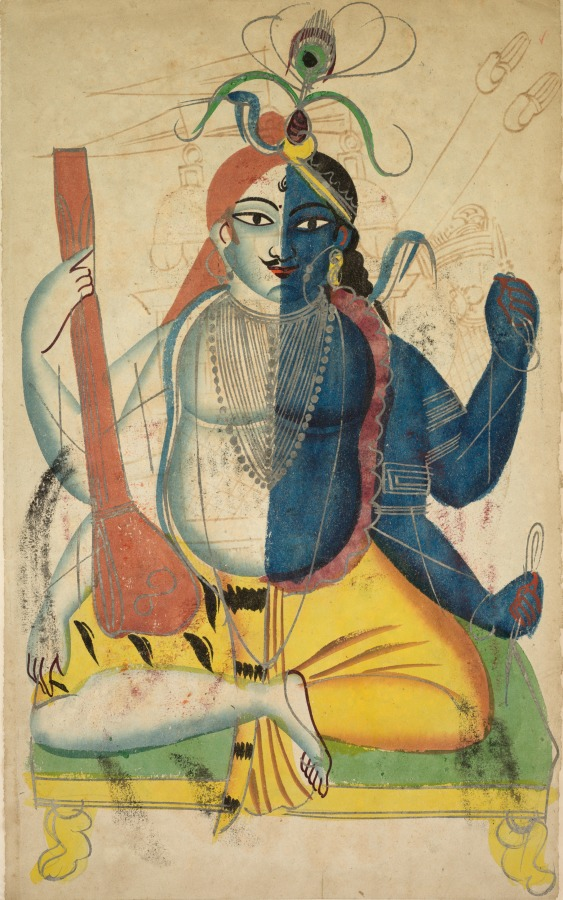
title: Leaf from a Kalighat album: Hari-Hara (recto); Vasudeva (Krishna's Father) Fleeing with Krishna Encounters a Cobra and a Jackal (verso)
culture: Eastern India, Bengal, Kolkata, Kalighat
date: c. 1890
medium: Gum tempera, graphite, ink, and tin on paper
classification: Painting